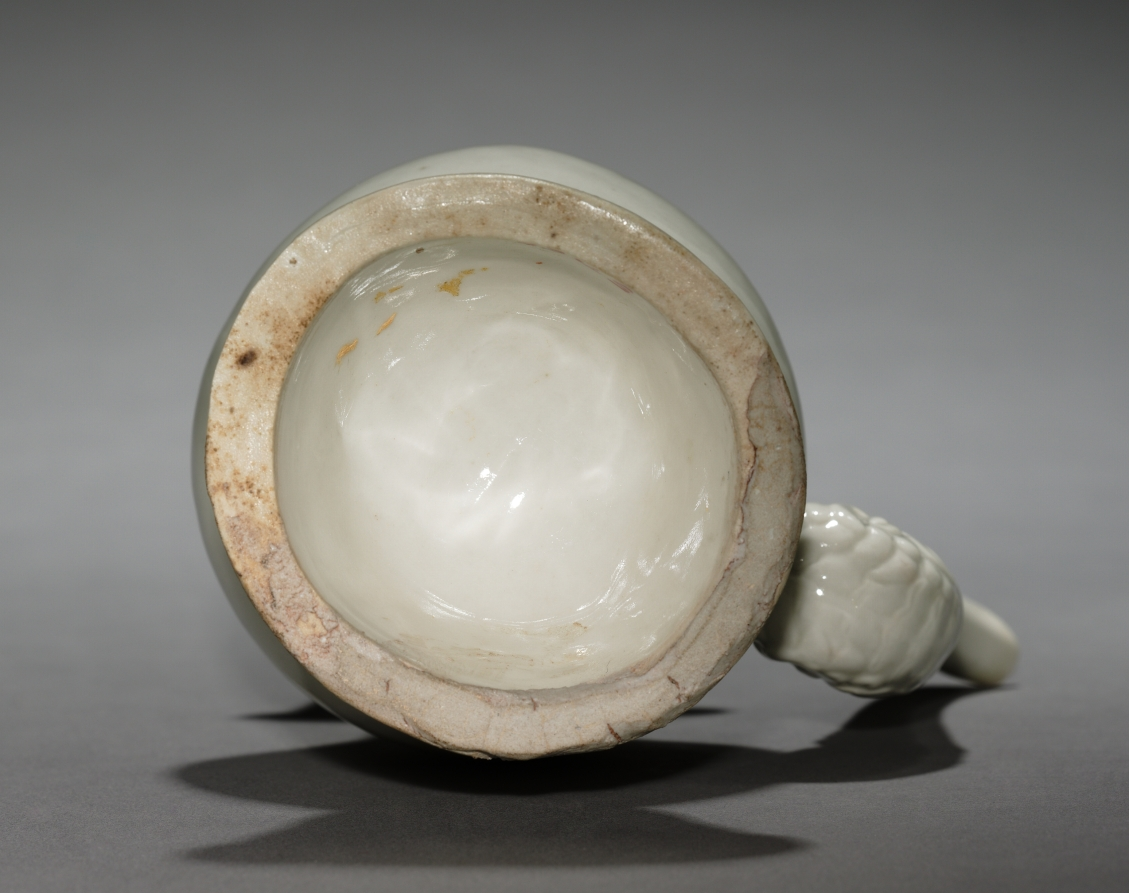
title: Ewer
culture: China, Yuan dynasty (1271-1368) - Ming dynasty (1368-1644)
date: 1300s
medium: porcelain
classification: Ceramic